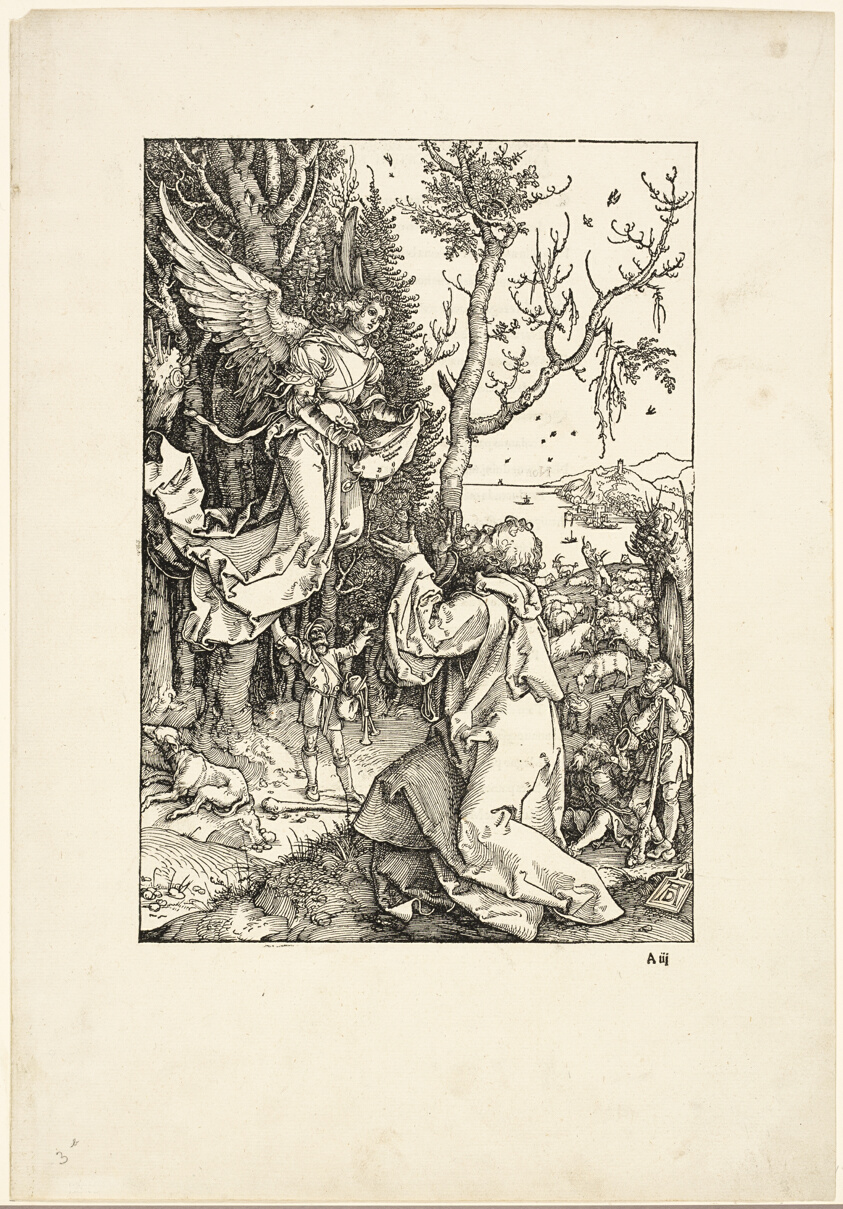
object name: Print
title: Joachim and the Angel, from The Life of the Virgin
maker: Albrecht Dürer (German, 1471-1528)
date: c. 1504, published 1511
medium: Woodcut in black on ivory laid paper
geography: Germany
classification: woodcut; print; prints and drawing; paper